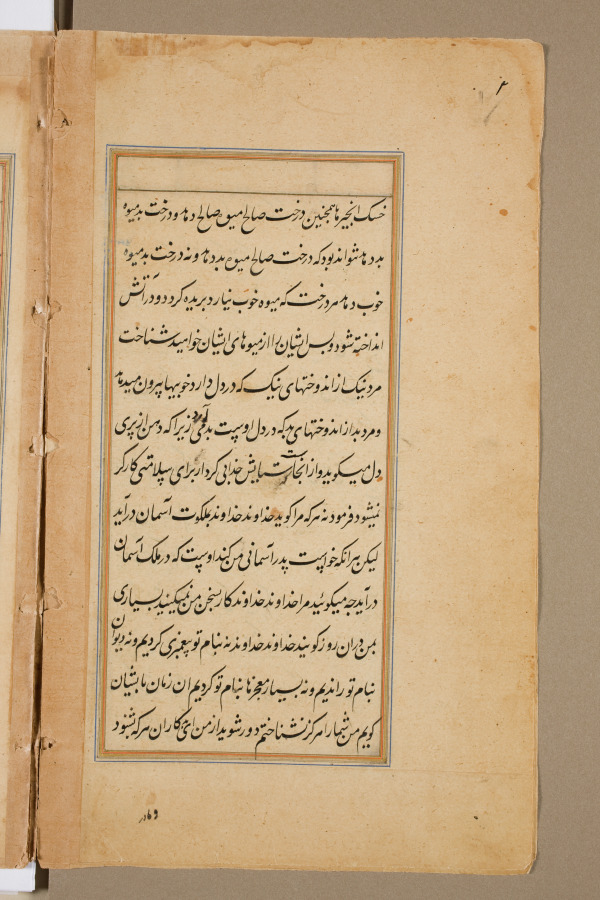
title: Text page from a Mirror of Holiness (Mir’at al-quds) of Father Jerome Xavier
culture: Mughal India, Allahabad, made for Prince Salim (1569–1627)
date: 1602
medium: Ink and gold on paper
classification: Manuscript